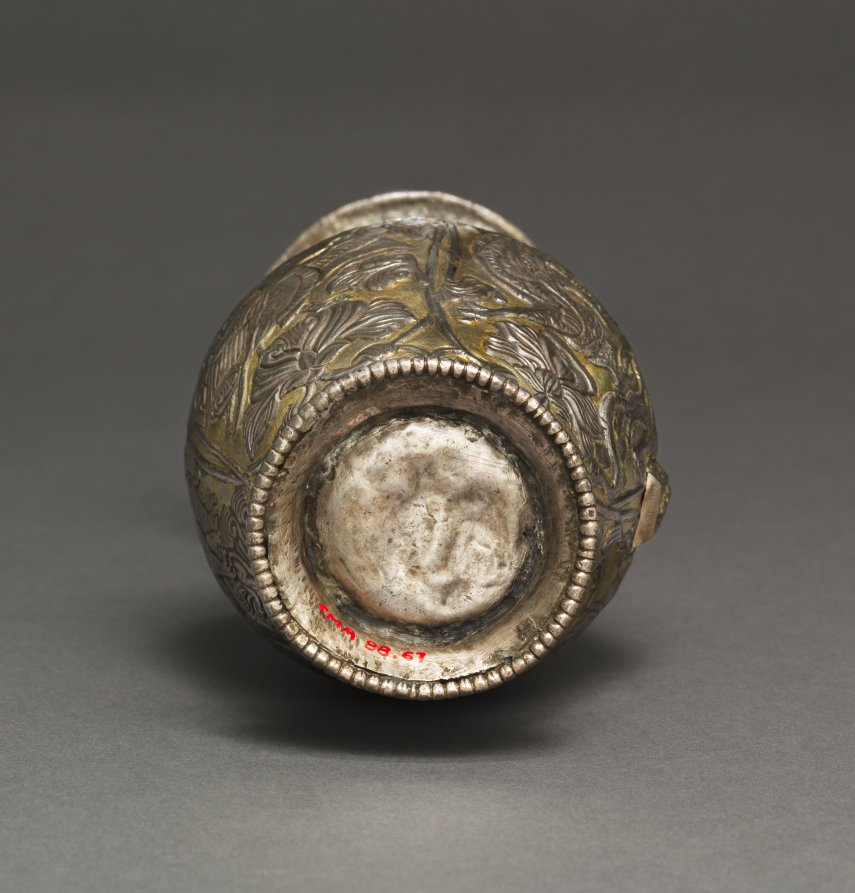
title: Vase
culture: Central Asia (Sogdiana) or Tibet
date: c. late 600s–early 700s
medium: silver with gilded foil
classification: Silver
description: Located amid the vast “silk roads” trade network, medieval Tibet was a place of dynamic cultural exchange. This decanter is evidence of such interactions. The vessel is part of the tableware used to hold wine during feasts. Tibetan elites adopted the tradition of consuming wine at social gatherings from their Iranian (Persian) contemporaries, whose wine banquets were lavish affairs with plentiful food and drink.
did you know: Lions were often seen as powerful protectors while phoenixes were associated with good fortune.